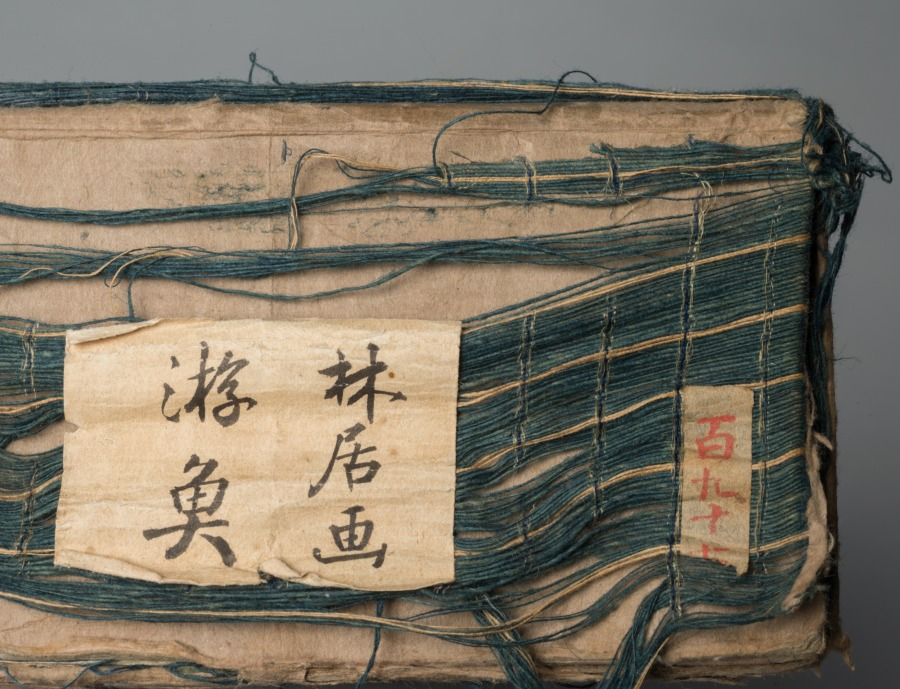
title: Fish and Rock; Fish and Seaweed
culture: Japan, Momoyama period (1573–1615)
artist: Rinkyo (Japanese)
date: 1573–1615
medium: pair of hanging scrolls; ink on paper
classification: Painting